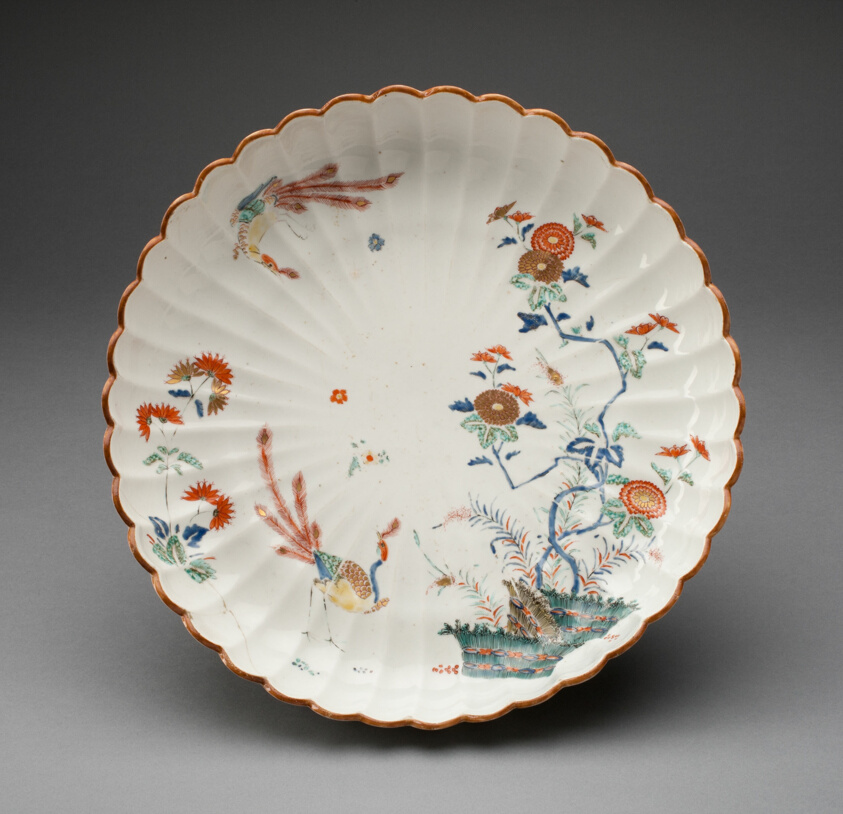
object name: Ceramics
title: Dish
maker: Chelsea Porcelain Manufactory; London, England, c. 1745-1784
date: 1750/60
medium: Soft-paste porcelain, polychrome enamels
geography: Chelsea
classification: dish (vessel); porcelain; ceramics; european decorative arts